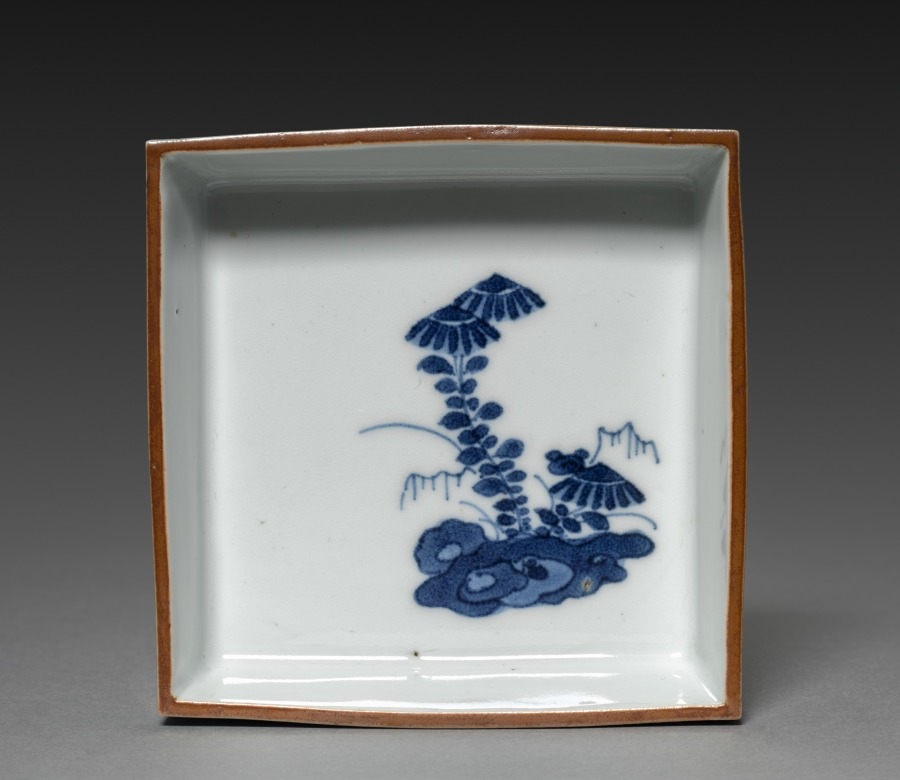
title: Side-Dish with Dandelion in Rocks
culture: Japan, Edo period (1615–1868)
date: 1700s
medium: One of a set of five dishes; porcelain with underglaze blue and overglaze iron oxide (Arita ware, Kutani style)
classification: Ceramic